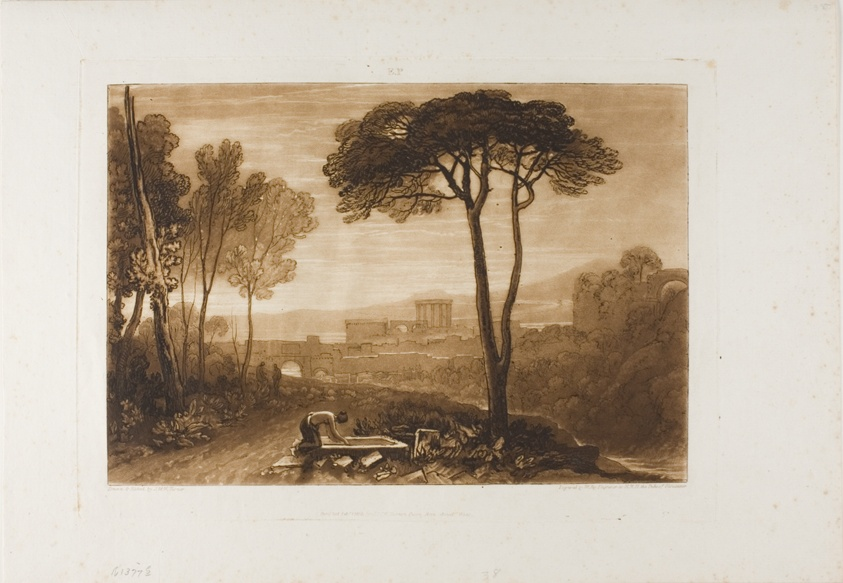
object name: Print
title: Scene in the Compagna, plate 38 from Liber Studiorum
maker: Joseph Mallord William Turner (English, 1775-1851)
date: published February 1, 1812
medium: Etching and engraving in brown on ivory wove paper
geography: England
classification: etching; print; prints and drawing